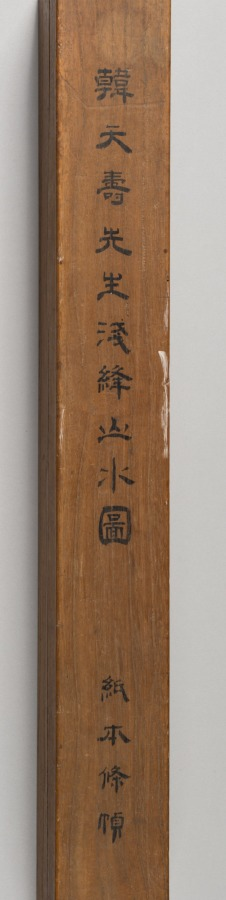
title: Landscape with Gentle Peaks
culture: Japan, Edo period (1615–1868)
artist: Kan Tenju (Japanese, 1727–1795)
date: 1767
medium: hanging scroll; ink and light color on paper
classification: Painting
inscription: 雨過嵐光煙／雲陽樹影諫／夕陽独在左／？卷讀残書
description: A figure sits in a retreat tucked into the mountains near a waterfall. The painter, Kan Tenju, was best known as a calligrapher and seal carver. Of Korean heritage, he was a patron of artist Ike Taiga (池大雅) (1723–1776), and a cousin of Taiga’s student Aoki Shukuya (青木 夙夜) (died 1802). His Chinese-style poem reads as follows: Smoky mist in the mountain reflects light after the rain, Sunlight passes through the clouds to cast shadows of the trees, Alone in the sunset, I read a well-worn book.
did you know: This painting combines image and calligraphy, connected by skillful brushwork.